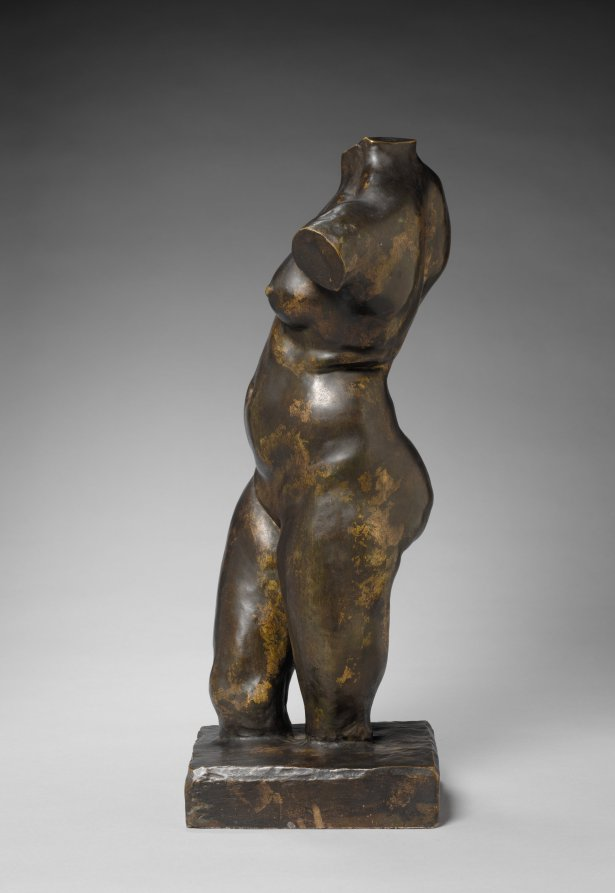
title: Torso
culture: France, 19th century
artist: Jules Dalou (French, 1838–1902)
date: c. 1850 – 1899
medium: bronze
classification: Sculpture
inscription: Signed: "J. Dalou"; "Susse Fres. Ed[ts] Paris"